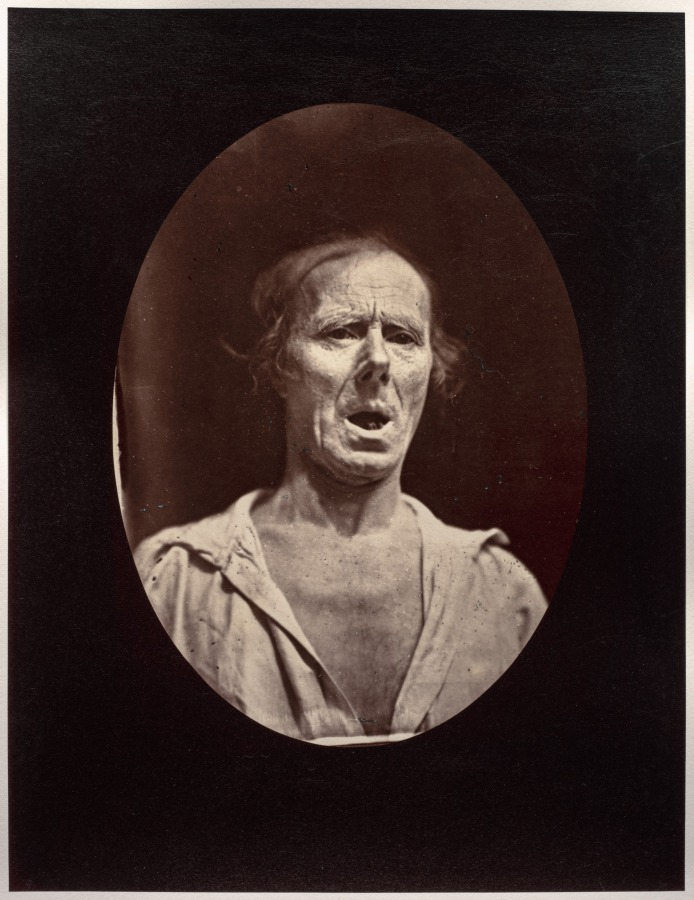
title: Figure 54: Abaissement volontaire de la mâchoire inférieure: mouvement inexpressif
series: Mécanisme de la physionomie humaine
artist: Guillaume-Benjamin-Amand Duchenne (de Boulogne) (French, 1806–1875)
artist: Adrien Tournachon (French, 1825–1903)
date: c. 1856, printed 1862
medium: Albumen print from glass plate negative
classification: Photograph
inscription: On the verso, lower left, in graphite, “fig 54”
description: Duchenne described this model, a former shoemaker, as “an old, toothless man, with a thin face, whose features, without being absolutely ugly, approached ordinary triviality.” When criticized for using such an unattractive model, Duchenne held him up as proof that “every human face could become spiritually beautiful through the accurate rendering of his or her emotions.”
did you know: Duchenne, a neurologist at a hospital for the poor in Paris, turned to photography to record the grammar of human expression.